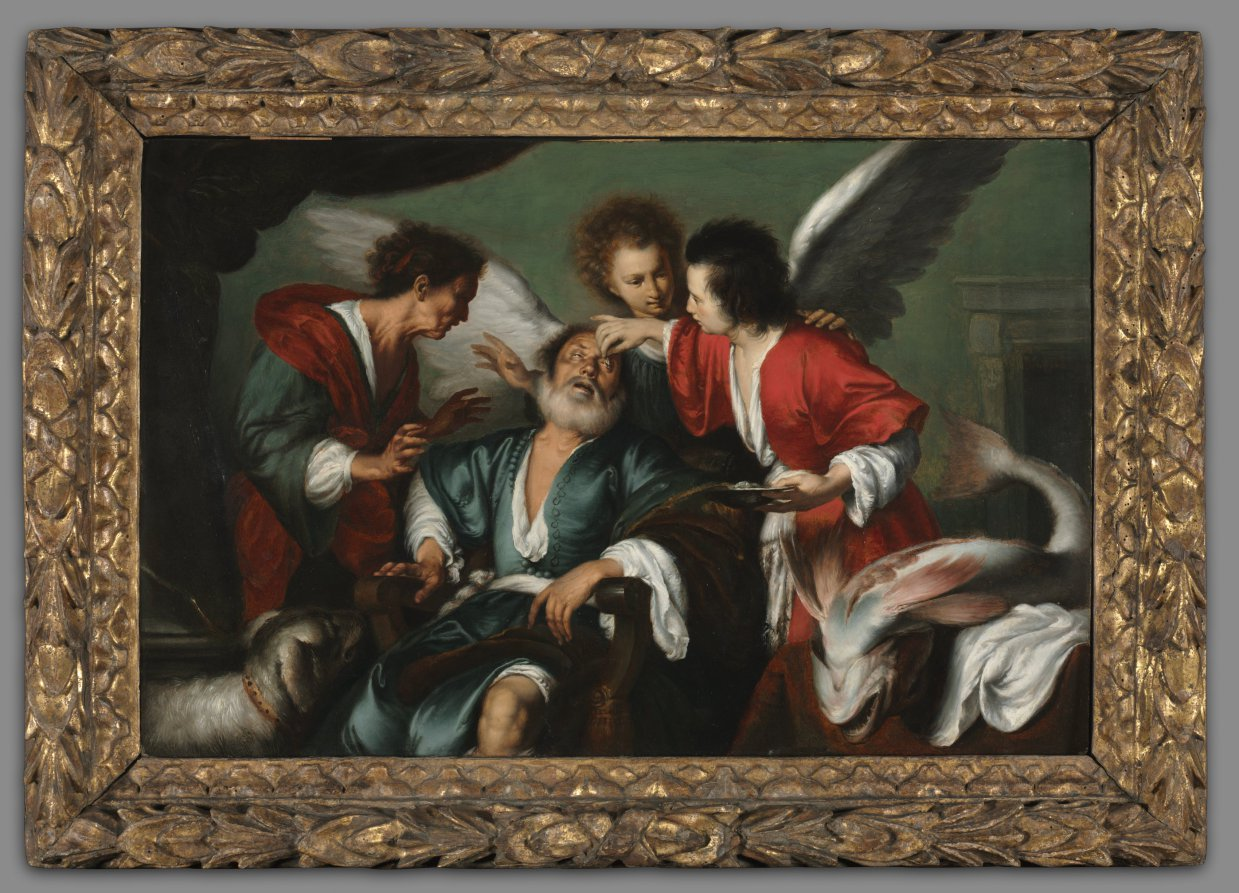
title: The Healing of Tobit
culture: Italy, 17th century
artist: Bernardo Strozzi (Italian, 1581?-1644)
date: c. 1625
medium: oil on wood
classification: Painting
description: This scene is the moving conclusion of the story of Tobias, the young man at the right. It addresses the themes of family devotion and trust. Tobias’s father sent him on a long journey to retrieve family money. The angel Raphael appeared as a relative, offering the traveler protection against such things as an attack by a huge fish, whose organs Tobias took on Raphael’s advice. Upon his return home, Tobias discovers his father has gone blind, and Raphael advises him to place the fish’s gallbladder on his father’s eyes to cure him. Strozzi depicts the miraculous cure and the moment in which Raphael reveals that he is an angel.